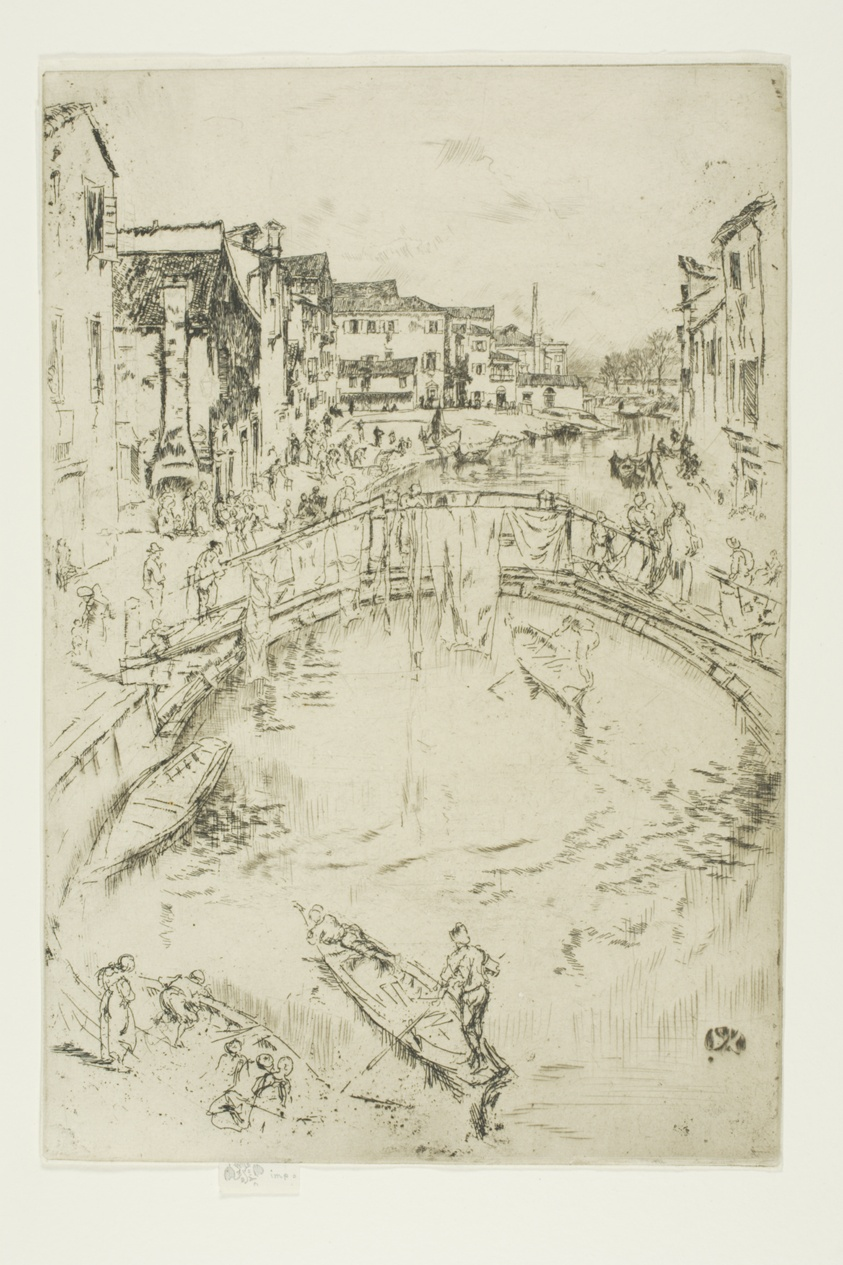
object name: Print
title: The Bridge, Santa Marta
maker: James McNeill Whistler (American, 1834-1903)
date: 1879/80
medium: Etching and drypoint with foul biting in black ink on cream laid paper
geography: United States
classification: etching; foul biting; drypoint; print; prints and drawing; paper